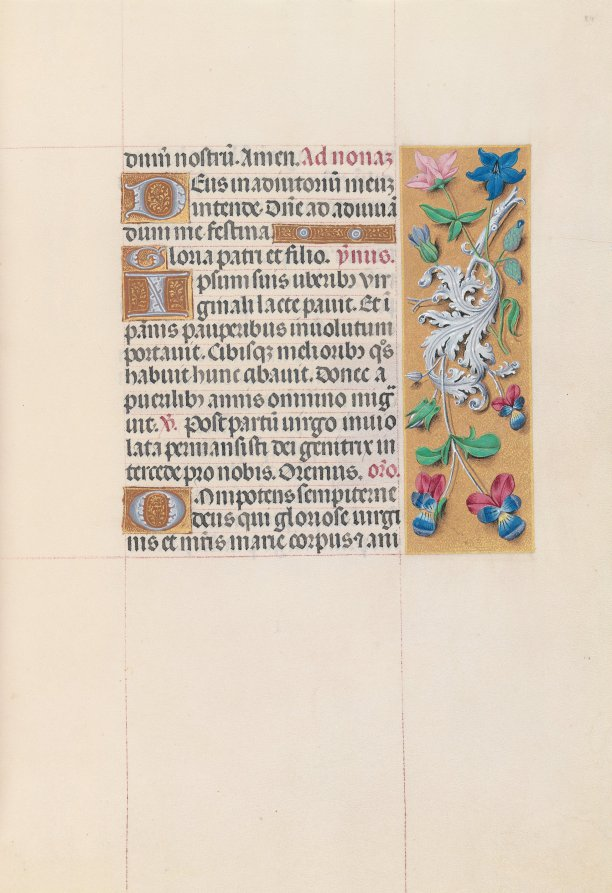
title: Hours of Queen Isabella the Catholic, Queen of Spain: Fol. 84r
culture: Flanders, Ghent and Bruges, late 15th century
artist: Master of the First Prayerbook of Maximillian (Flemish, c. 1444–1519)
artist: and Associates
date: c. 1500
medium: ink, tempera, and gold on vellum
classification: Bound Volume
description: This manuscript was illuminated by a circle of at least five highly organized manuscript painters active in the Flemish cities of Ghent and Bruges. The principal illuminator was Alexander Bening, who painted the majority of the book's miniatures. Manuscripts produced by this circle of artists are renowned for the decoration of their borders, which typically feature a rich variety of realistically-painted flowers, birds, and butterflies. This prayer book, called a book of hours, was intended not for a cleric, but for the private devotions of a lay person-in this case, Isabella the Catholic, Queen of Spain (1451-1504). Isabella's coat of arms embellishes the book's frontispiece. It is unlikely that the book was commissioned by the Queen herself; rather, she probably received it as a diplomatic gift from someone courting her patronage, perhaps Cardinal Francisco Jimenez de Cisneros. A Franciscan friar, Jimenez was dependent upon Isabella for his advancement, first to the post of Queen's confessor in 1492, and then to Archbishop of Toledo in 1495.